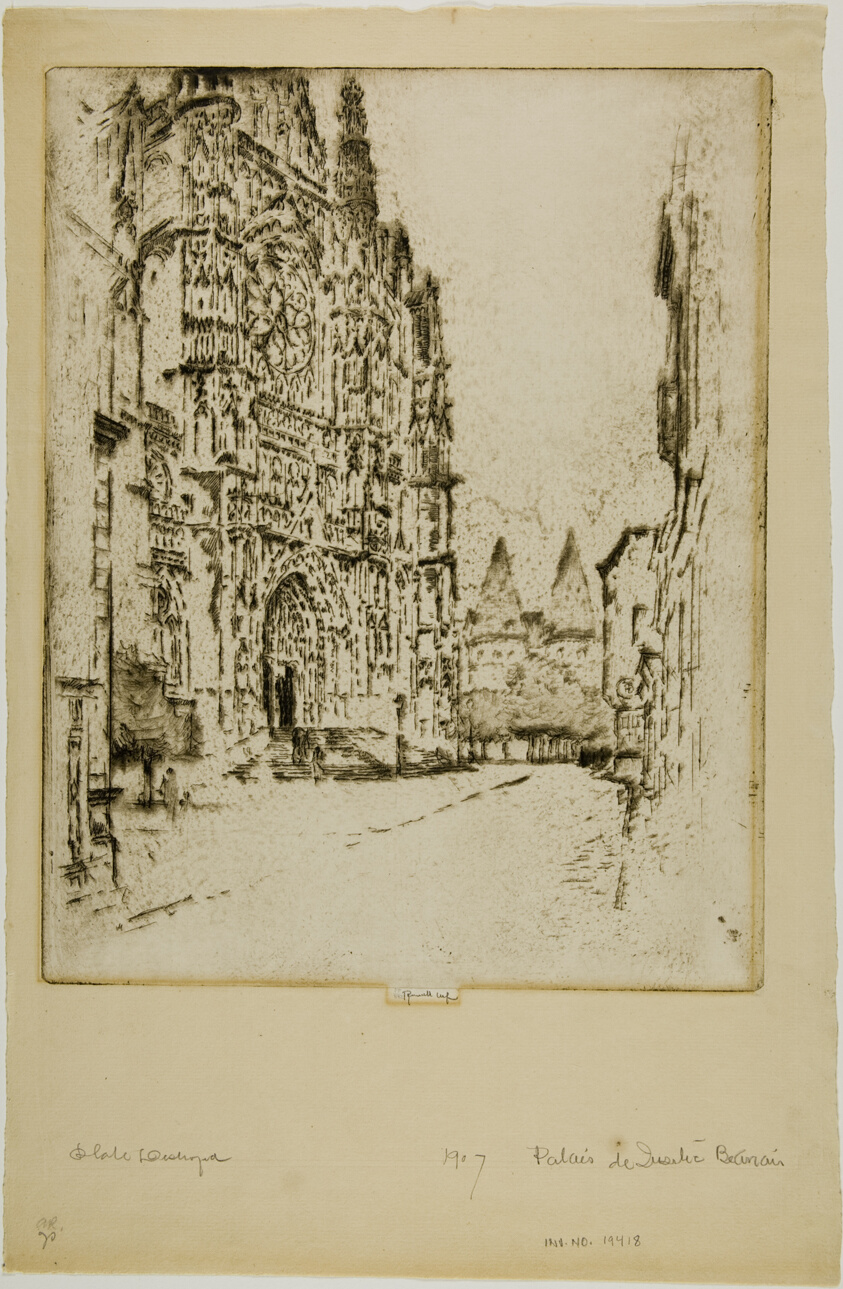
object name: Print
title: Towers of the Bishop's Palace, Beauvais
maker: Joseph Pennell (American, 1857-1926)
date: 1907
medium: Etching and drypoint on ivory laid paper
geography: United States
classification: etching; print; prints and drawing